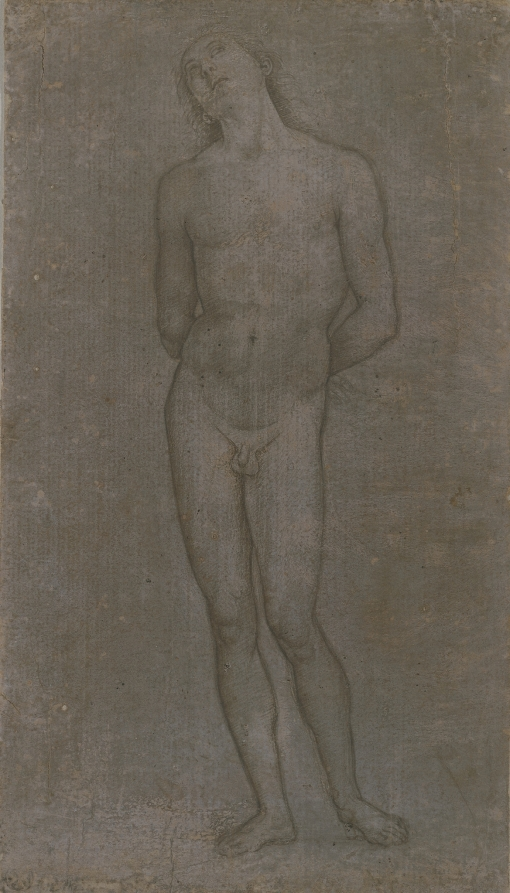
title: Saint Sebastian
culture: Italy, 15th century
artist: Perugino (Italian, c. 1450/55–1523)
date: c. 1493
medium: metalpoint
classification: Drawing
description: The Florentine painter Perugino made drawings to record figural types and poses that could be repeated throughout his finished paintings. He used the elegant, graceful figure seen here, with its soft athletic body and upwardly turned gaze, in at least two paintings of the 3rd-century martyr Saint Sebastian (the related paintings are now in the collection of the Galleria degli Uffizi, and the Louvre). Sebastian was shot with arrows after being exposed as a Christian convert; he was particularly revered during the Renaissance as a protector against illness such as the plague. Portrayal of the saint required Perugino to express his knowledge of human anatomy, while evoking the gentle s-curve associated with classical sculpture. Drawn with metalpoint, a typical drawing medium in the 1400s, the reinforced lines along the contour of the figure indicate that it was probably used by the artist or by one of his many studio assistants to transfer the design to another sheet.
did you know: The elegant pose of Saint Sebastian here was used by the artist in at least two finished paintings of the saint.